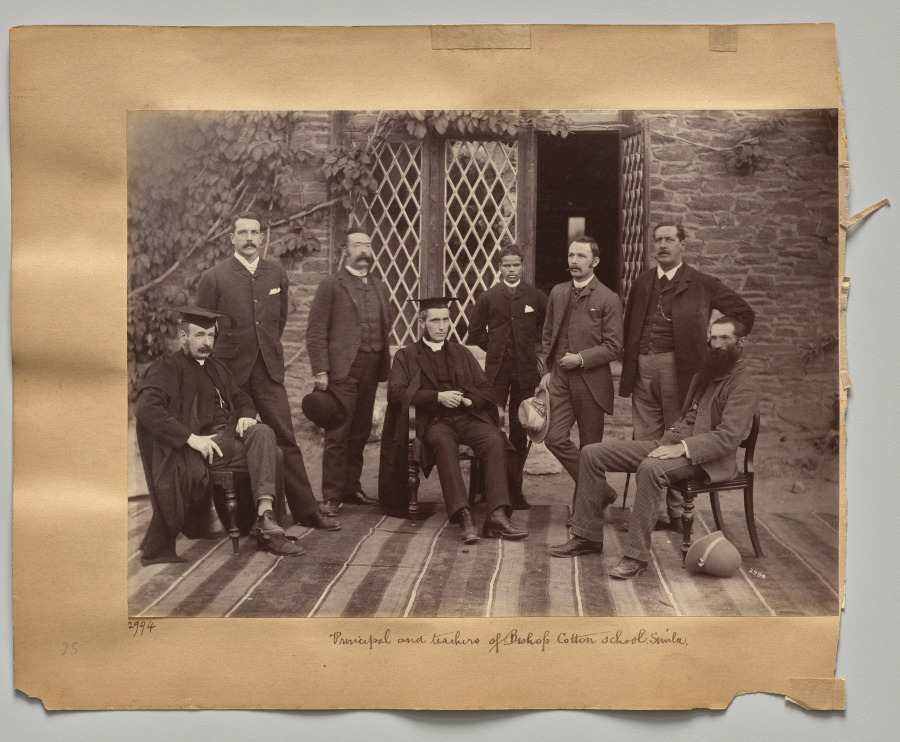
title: Principal and Teachers of Bishop Cotton School, Shimla (recto)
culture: India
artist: Raja Deen Dayal (Indian, 1844–1905)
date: c. 1882–87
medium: albumen print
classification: Photograph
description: These photographs are part of an album, now disassembled, of around 105 photographs taken in India between 1885 and summer 1887 that provide glimpses into the lives of the British colonial elite and royal and upper-class Indians. The museum holds another group of 37 pictures from this album (2016.266), which was probably commissioned by a British civil servant visiting or working in India around 1888 as a personal souvenir of his experiences there.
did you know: Raja Deen Dayal is regarded now, and was considered during his lifetime, to be India’s most important 19th-century photographer.